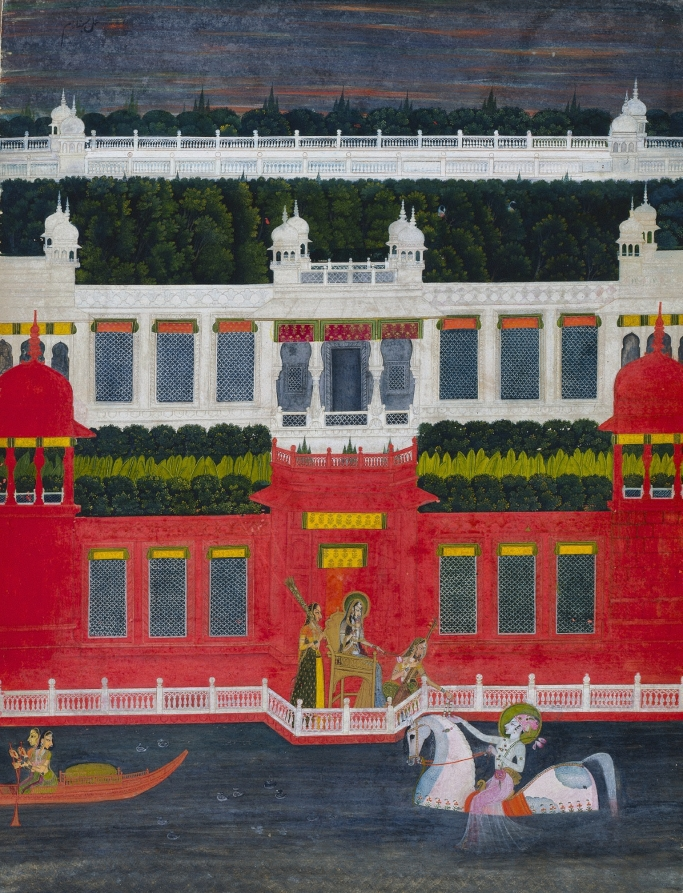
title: Krishna Receives a Flower Garland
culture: India, Rajasthan, Kishangarh School, 18th century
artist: Sitaram (Indian)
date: c. 1750–60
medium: Gum tempera, ink, and gold on paper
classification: Painting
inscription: upper left: amal-i Sitram